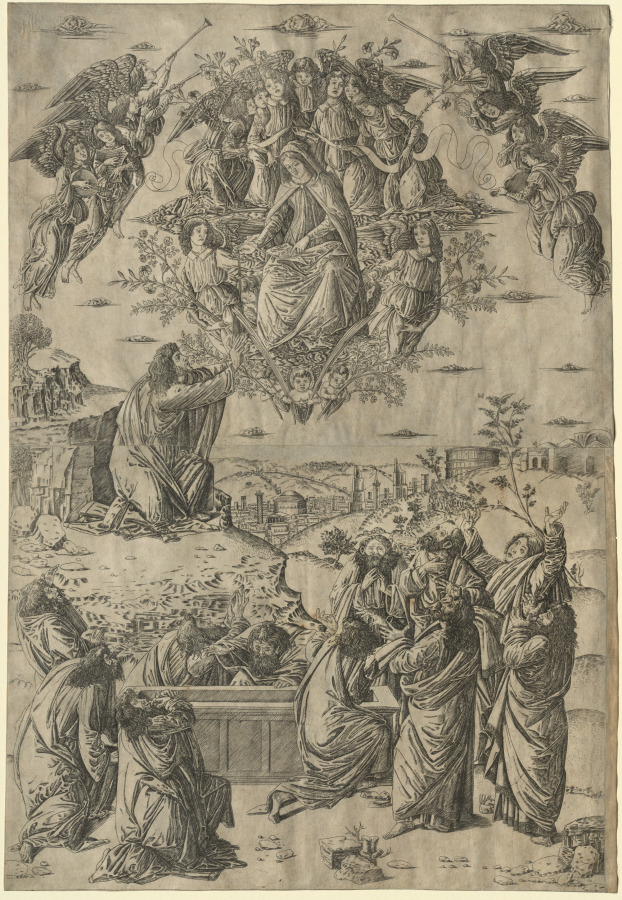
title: The Assumption of the Virgin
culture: Italy, Florence, 15th century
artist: Francesco Rosselli (Italian, 1448-about 1513)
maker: after Sandro Botticelli (Italian, 1444/45–1510)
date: c. 1495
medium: engraving printed on two sheets from two plates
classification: Print